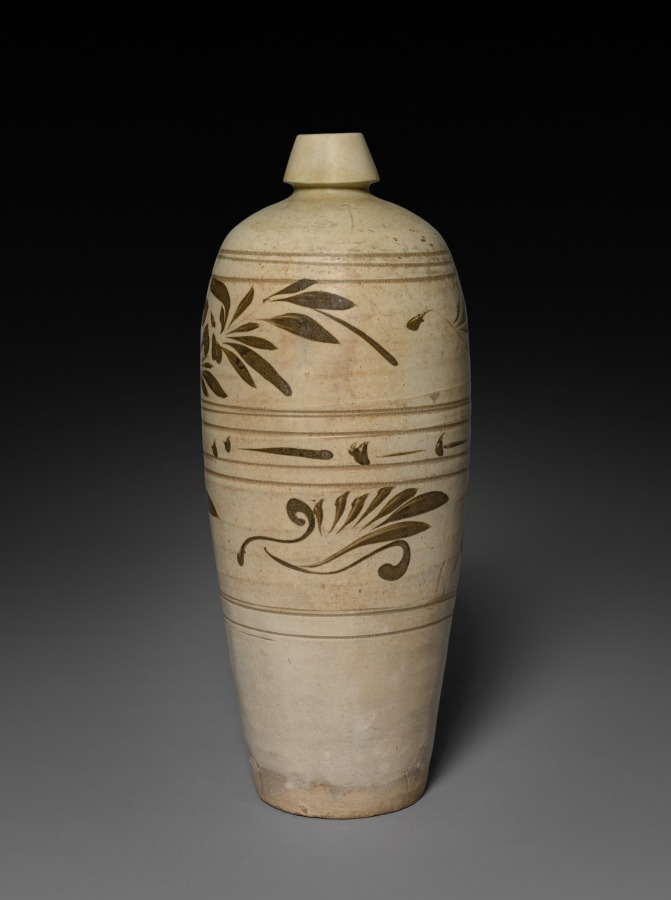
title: Meiping (Plum Blossom) Vase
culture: China, Northern Song dynasty (960-1127) - Jin dynasty (1115-1234)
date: 1100s–1200s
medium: Buff stoneware, slip coated with painted underglaze decoration, Cizhou ware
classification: Ceramic